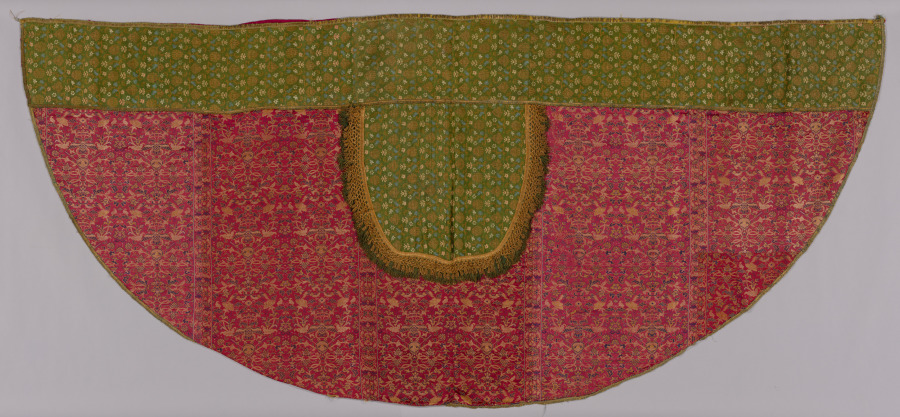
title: Cope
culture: China, Macao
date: 1500s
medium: Silk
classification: Garment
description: Silk fabric woven in China with European motifs was transported by European traders by the early 16th century. This popular pattern features a crowned double-headed eagle grasping arrows in its claws above a vase emitting blossoming vines. The eagle motif was derived from the Habsburg coat of arms, rulers of Spain and Austria during the 1500s and 1600s. Vertical borders with Chinese flora occur near the selvages of the five silk lengths forming the cope. The gilt-metal braided and fringed hood and broad orphrey band, or ornamental border, along the front edges feature fashionable small-scale floral sprigs.